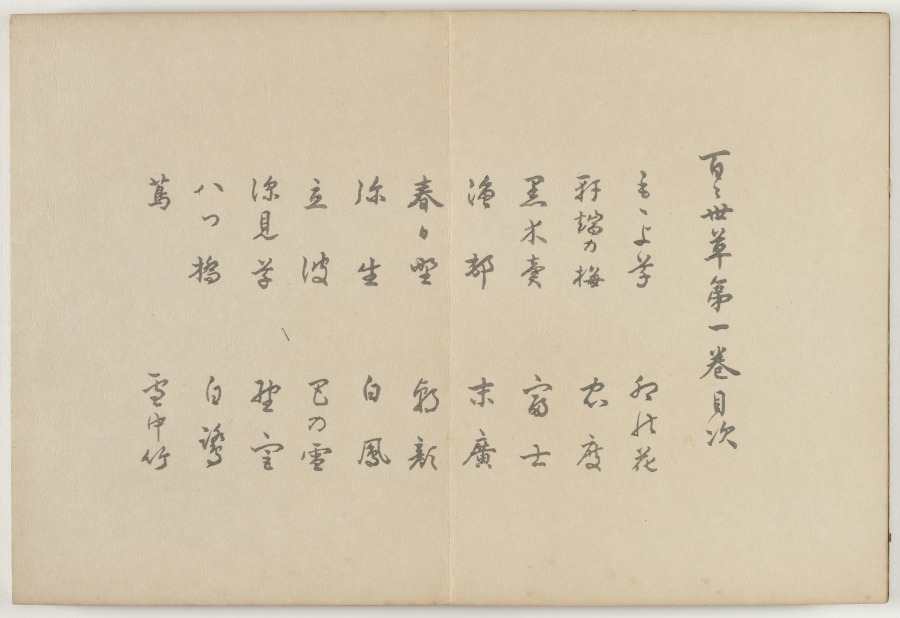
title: Flowers of a Hundred Worlds (Momoyogusa), Vol. 1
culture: Japan, Meiji period (1868–1912)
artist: Kamisaka Sekka (Japanese, 1866–1942)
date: 1909–10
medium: one of a set of three woodblock-printed folding-books; ink, color, gold, and silver on paper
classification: Bound Volume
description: This is the first of a set of three woodblock printed albums by Kamisaka Sekka, the artist considered the last major exponent of the Rinpa style of painting and design associated with the artists Tawaraya Sōtatsu (died about 1640) and Ogata Kōrin (1658-1716). Momoyogusa, in addition to meaning "flowers of a hundred worlds," is a classical name for the chrysanthemum. It appears in a poem by Mimube no Tarukuni (dates unknown) written in 755 and contained in the first Japanese imperial poetry anthology, Collection of Ten Thousand Leaves (Man'yōshū). In the poem, Tarukuni, who was posted in northern Kyushu as a guard at the time, asked a missed beloved in his home province to be well for a hundred nights, like the chrysanthemums growing in his parents' garden. Chrysanthemums are traditionally associated with longevity, and in some cases immortality. This volume of Sekka's series includes a preface poem by the Kyoto-based physician and poet Sugawa Nobuyuki (1839-1917) that may be glossed as follows: As we move forward in the spirit of the new age, "flowers of a hundred worlds" sown by seed, now blossom in distinctive colors and scents (translation by John T. Carpenter)